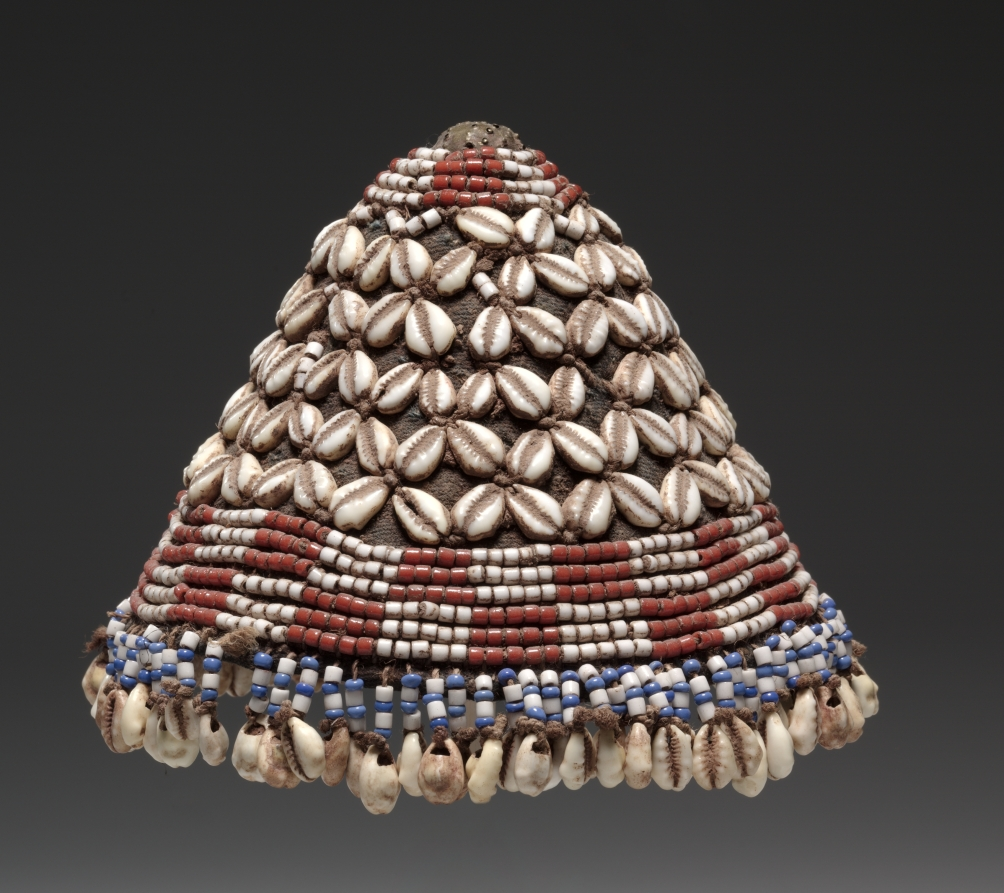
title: Cap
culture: Africa, Central Africa, Democratic Republic of the Congo, Kuba-style maker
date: early 1900s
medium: Plant fibers, cloth, glass beads, cowrie shells, and copper alloy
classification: Garment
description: Costumes worn by the Kuba king, members of his family, and the nobility are spectacular. Raffia cloth, leopard skin, feathers, beads, and cowrie shells are combined in magnificent ensembles used for specific ceremonial roles. Beaded caps of this sort are worn only by members of the royal family. When not in use, they are preserved in royal storehouses.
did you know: The beads and shells on this cap were imported from outside of central Africa.